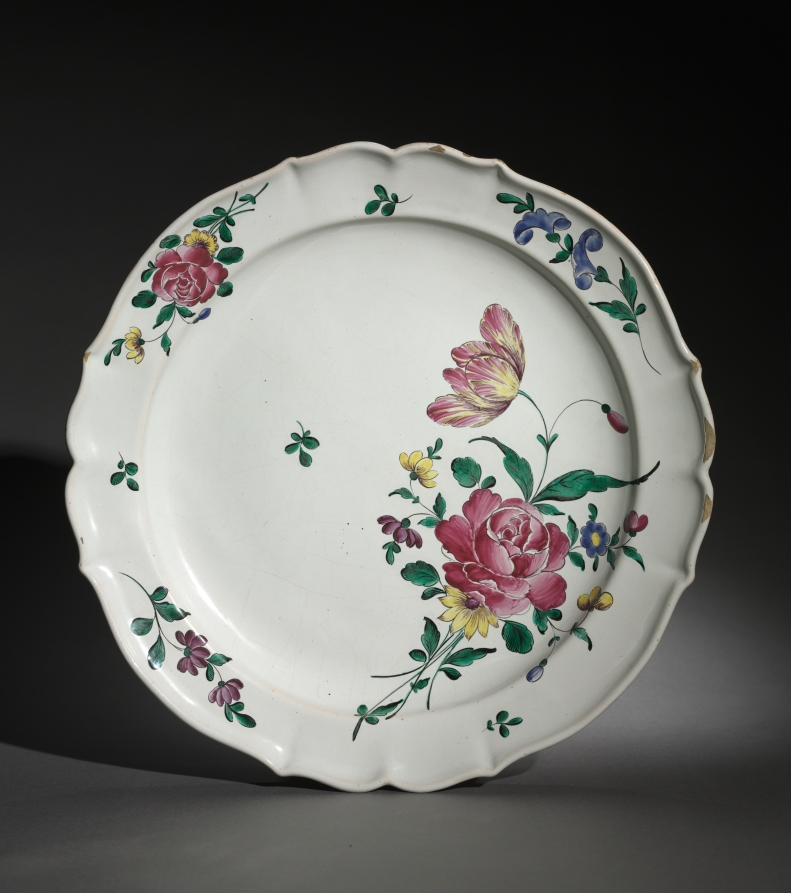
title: Plate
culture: France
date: c. 1750–70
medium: faience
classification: Ceramic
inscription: Tag on the back of plate reads "Meillones c. 1765"